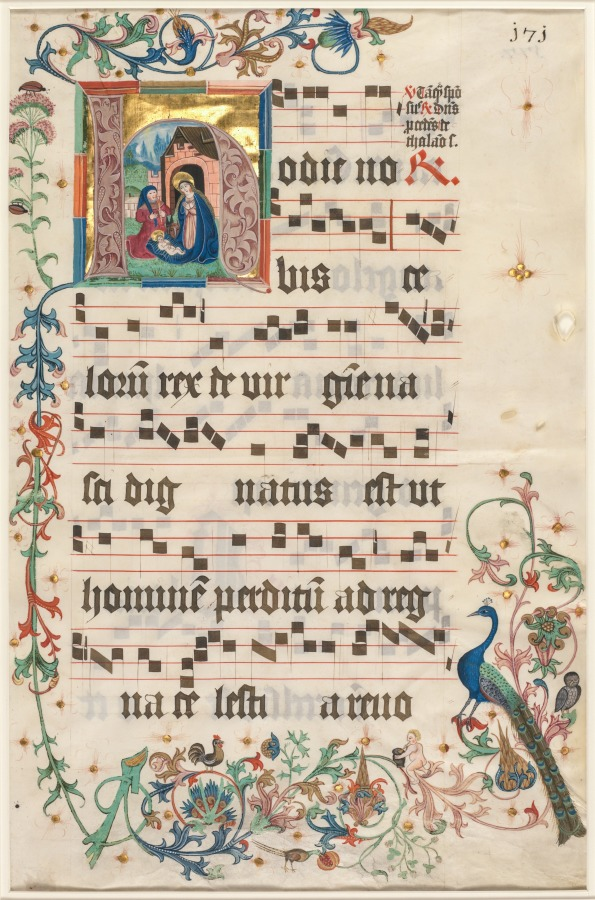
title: Leaf from an Antiphonary: Initial H with the Nativity (recto)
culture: South Germany, Augsburg (?), 15th century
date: c. 1480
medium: ink, tempera and gold on vellum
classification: Manuscript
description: The peacock in the lower right margin is used here as a symbol of immortality. In the ancient world the peacock's flesh was thought to be incorruptible—to never decay—and was thus an appropriate symbol for the Virgin Mary who was taken bodily into heaven. The peacock is often used as an accessory illustration for representations of the Nativity. The text for this leaf is the first matins response for Christmas Day and begins Hodie nobis celorum rex (On this day the King of Heaven). The leaf survives with two known sister leaves with text and illustrations that refer to Saint Clare, who was widely venerated during the Middle Ages. She is closely associated with Saint Francis, who installed her with a group of Benedictine nuns in a community at Assisi. Francis prescribed an austere way of life for the nuns who thereafter were known as the Poor Clares. The saint died in 1253 and was canonized in 1255. The prominent references to Clare in the parent manuscript to which this leaf belongs indicate that it was made for a religious community belonging to that order, perhaps in Augsburg or elsewhere in South Germany.